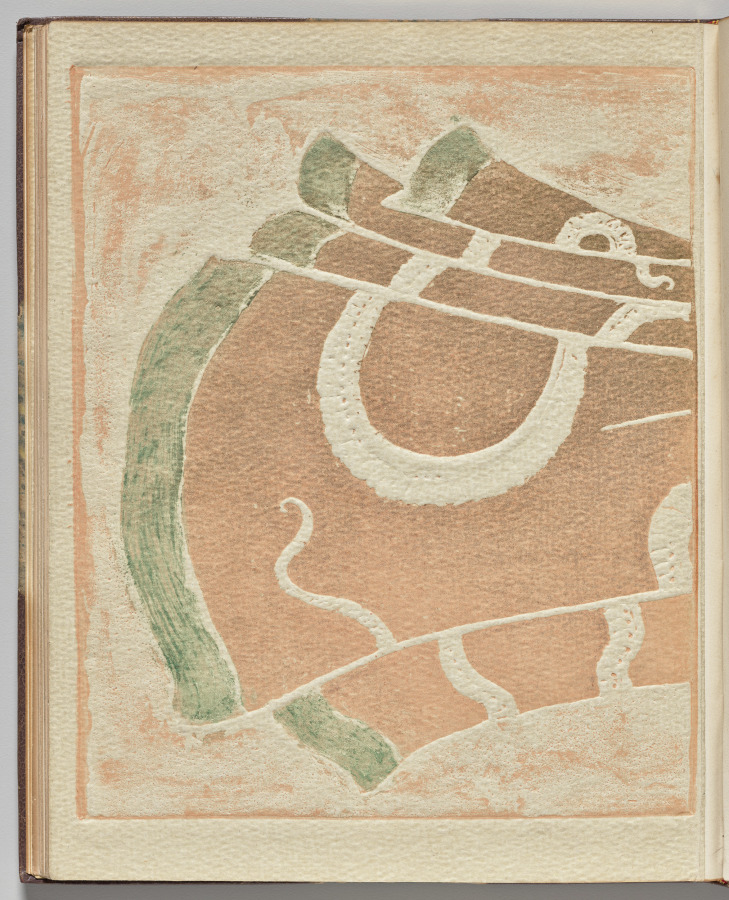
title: Decorative Drapery Motif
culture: France, early 20th Century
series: La Loïe Fuller, by Roger Marx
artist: Pierre Roche (French, 1855–1922)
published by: Les Cents Bibliophiles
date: 1904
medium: gypsograph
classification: Bound Volume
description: Although best known as a sculptor, Roche was a versatile and prolific artist who worked in many mediums. Loïe Fuller, the pioneer of modern dance who took Paris by storm in 1892, was one of his favorite subjects. He portrayed her in clay, bronze, marble, plaster, and in a series of gypsographs that illustrated an essay by the art critic Roger Marx. The book was described as "a precious monument to Loïe Fuller."